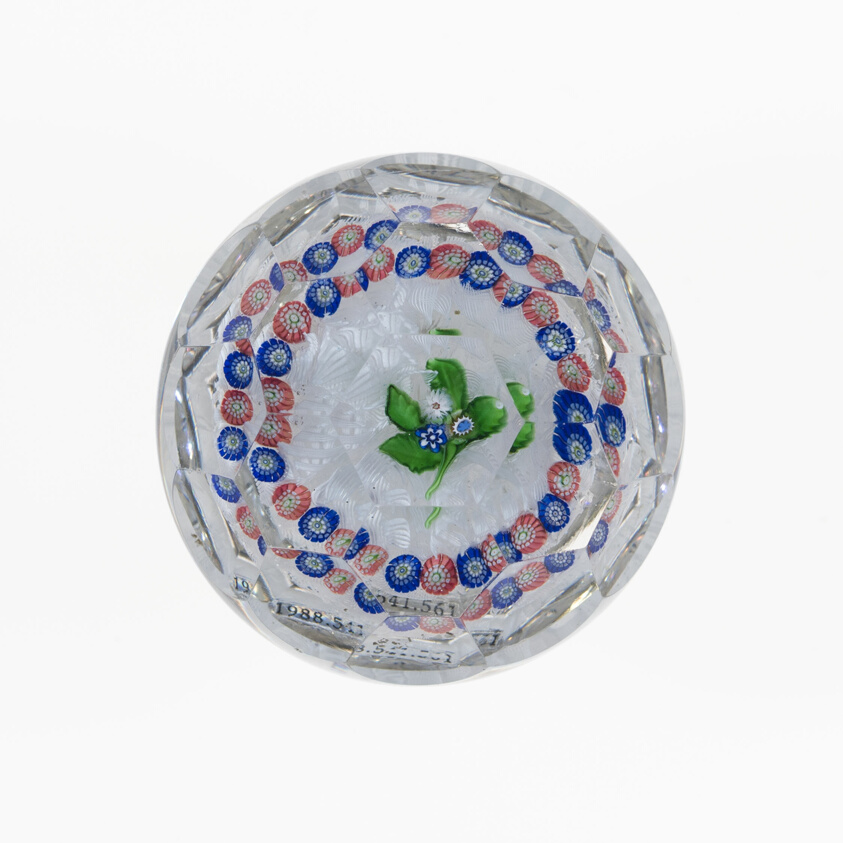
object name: Glass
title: Doorknob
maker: Saint-Louis Glassworks (Cristalleries de Saint-Louis); Lorraine, France, founded 1586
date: c. 1845–60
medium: Glass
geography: France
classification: paperweight; glass